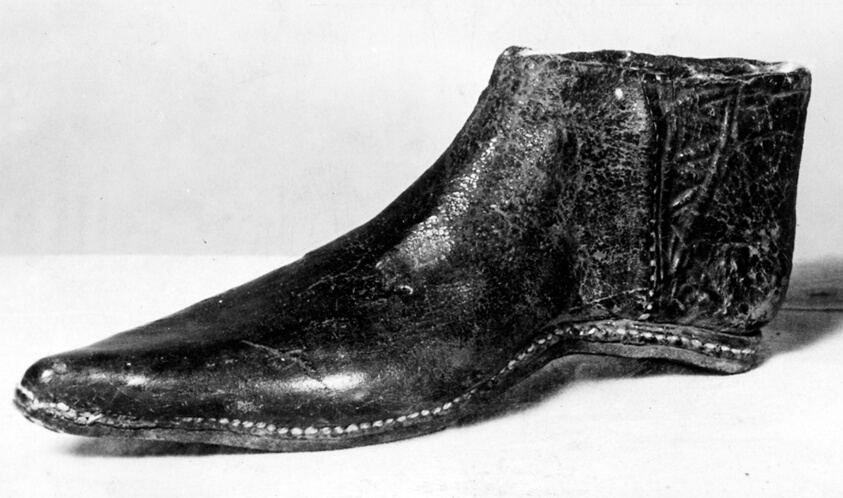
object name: Textile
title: Girl's Shoe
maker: England or France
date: 15th century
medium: (Black) leather (Toe originally longer end turned up)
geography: England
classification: textile; shoes - misc; costume accessory - shoe; costume; dress (garment); clothing